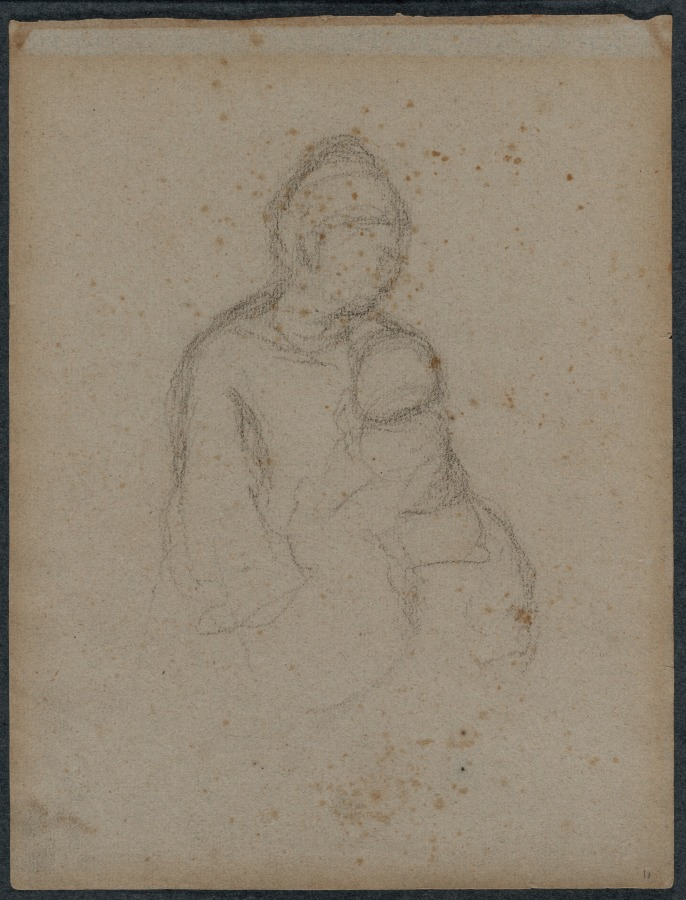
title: Mother and Child (recto); Profile Bust of a Man (verso)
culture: France, 19th century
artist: Paul Gauguin (French, 1848–1903)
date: 1870s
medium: black chalk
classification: Drawing